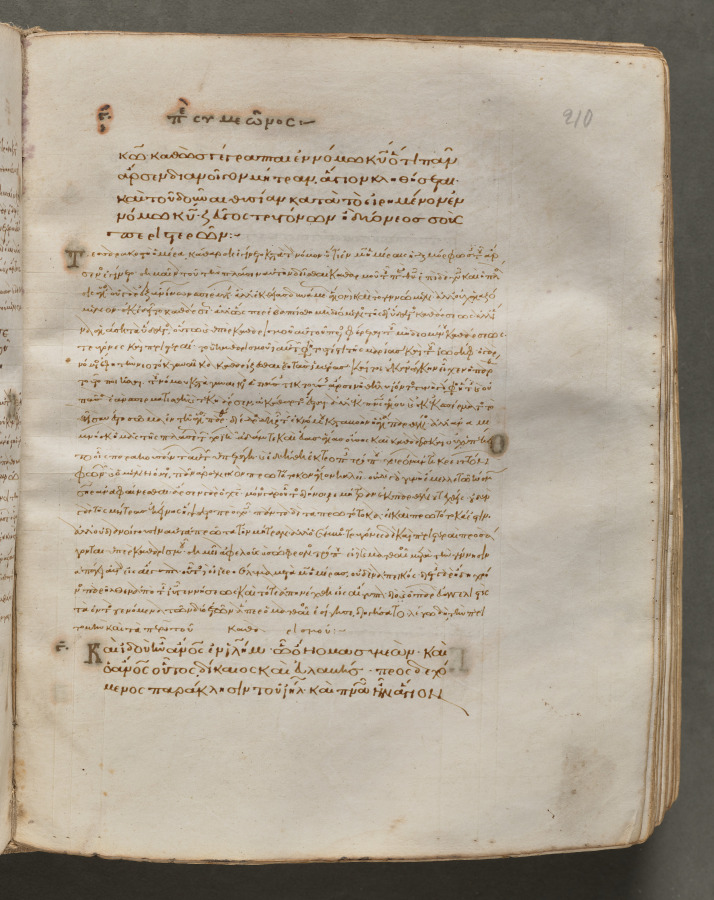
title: Text, folio 210 (recto), from a Gospel Book with Commentaries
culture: Byzantium, Constantinople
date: c. 1000–1100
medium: ink, tempera, and gold on vellum; leather binding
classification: Bound Volume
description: Each of the four gospels in this book opens on a page with brilliantly illuminated borders depicting the author of the text as well as birds-principally peacocks, symbols of the immortality of the soul-and fountains, representing the fountain of life and the salvation of the soul. This volume consists of 428 leaves with texts in Greek. Its level of sophistication suggests that it was probably written and decorated in a monastery in Constantinople.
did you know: Gospel Books were carried in procession through Byzantine churches.